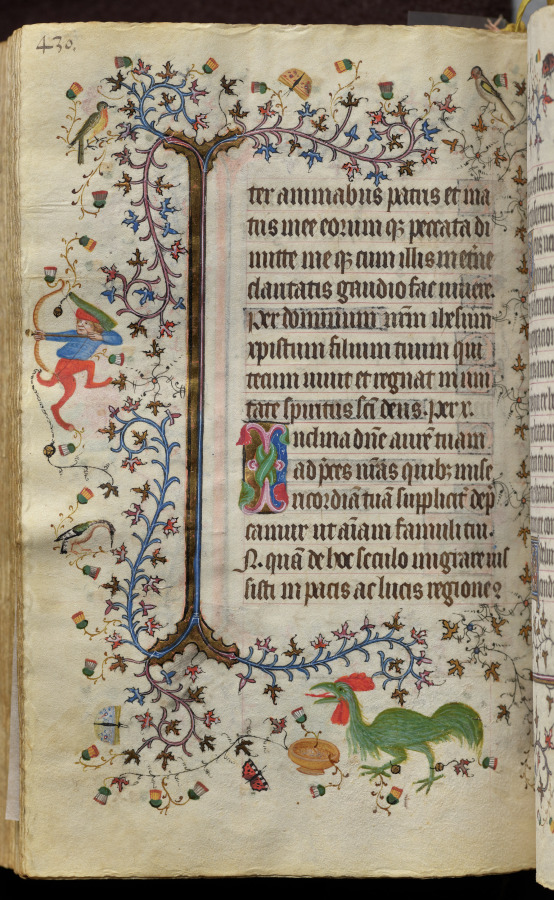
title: Hours of Charles the Noble, King of Navarre (1361-1425): fol. 209v, Text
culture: France, Paris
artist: Master of the Brussels Initials and Associates (French)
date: c. 1405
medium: ink, tempera, and gold on vellum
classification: Bound Volume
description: This precious volume was obviously highly prized by its owner, the French-born King of Navarre, who had his coat of arms painted on no less than twenty folios. Rather than directly commissioning this manuscript from a specific workshop, it seems that Charles the Noble acquired his book of hours -- perhaps ready-made for the luxury market -- while on a trip to Paris in 1404-05. A collaborative effort, six painting styles are evidenced within the pages of this codex, those of two Italians, two Frenchmen, and two Netherlanders. The painter who was responsible for the planning and decoration of the book, and who produced seventeen of the large miniatures, was a Bolognese artist known as the Master of the Brussels Initials. His principal assistant, responsible for most of the borders, was a Florentine who signed his name "Zecho" da Firenze on folio 208 verso.